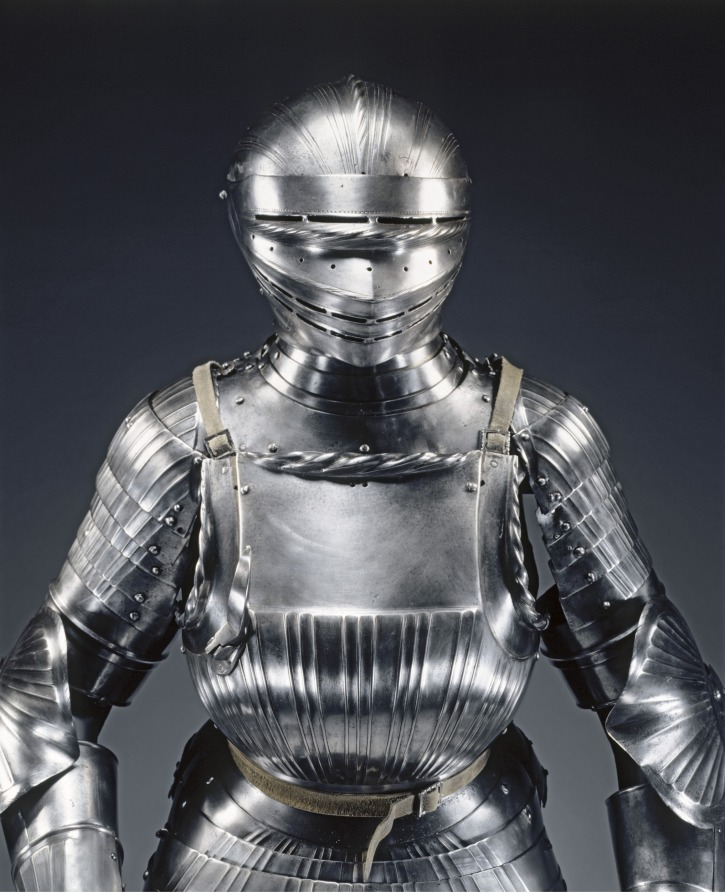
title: Field Armor in Maximilian Style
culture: Germany, Augsburg(?), early 16th century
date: c. 1510–15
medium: fluted steel with leather straps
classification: Arms and Armor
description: Most of the elements of this armor were made together, forming a single suit. The lower legs contain some modern restorations. The helmet is believed to be the work of the esteemed Augsburg armorer, Lorenz Helmschmied, who was active at the Habsburg, Mantua, and Urbino courts between 1467 and his death in 1515.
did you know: This armor was made to mimic the trend of pleated clothing that was popular at the time.